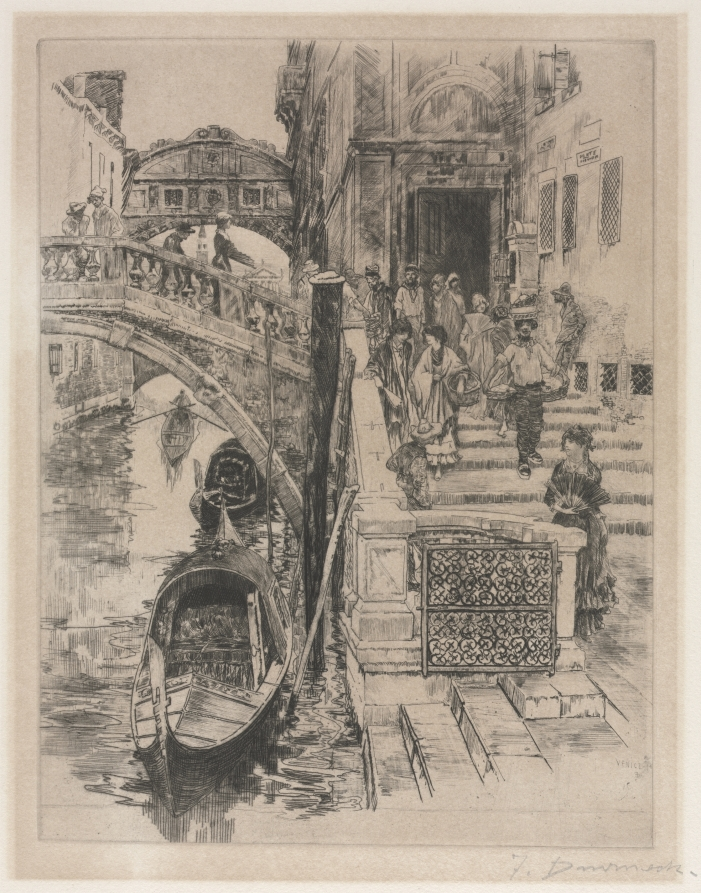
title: The Bridge of Sighs (second plate)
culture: America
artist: Frank Duveneck (American, 1848–1919)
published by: Robert Dunthorne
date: 1885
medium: etching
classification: Print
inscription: Lower margin, in pencil: "F. Duveneck"